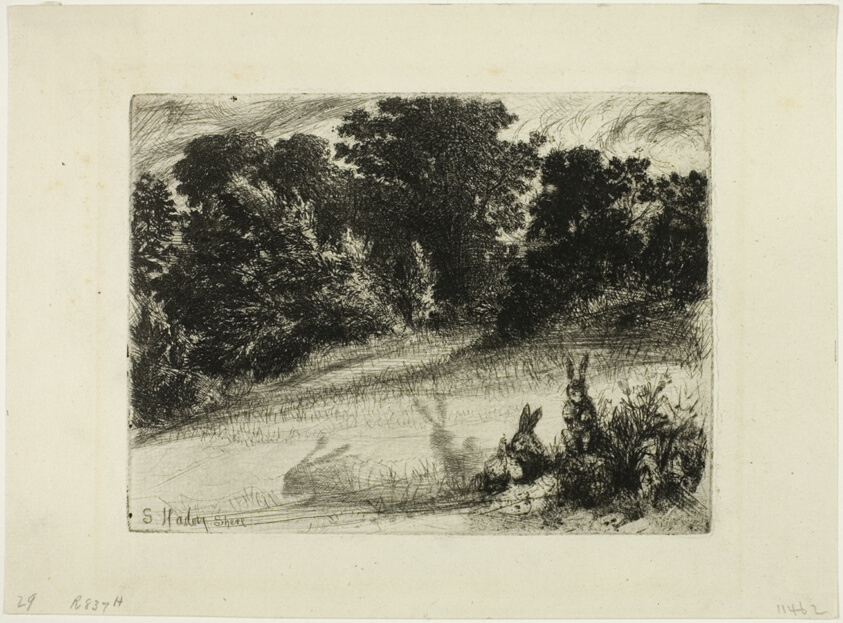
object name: Print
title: Combe Bottom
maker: Francis Seymour Haden (English, 1818-1910)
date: 1860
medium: Etching and drypoint on cream laid paper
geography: England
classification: etching; print; prints and drawing